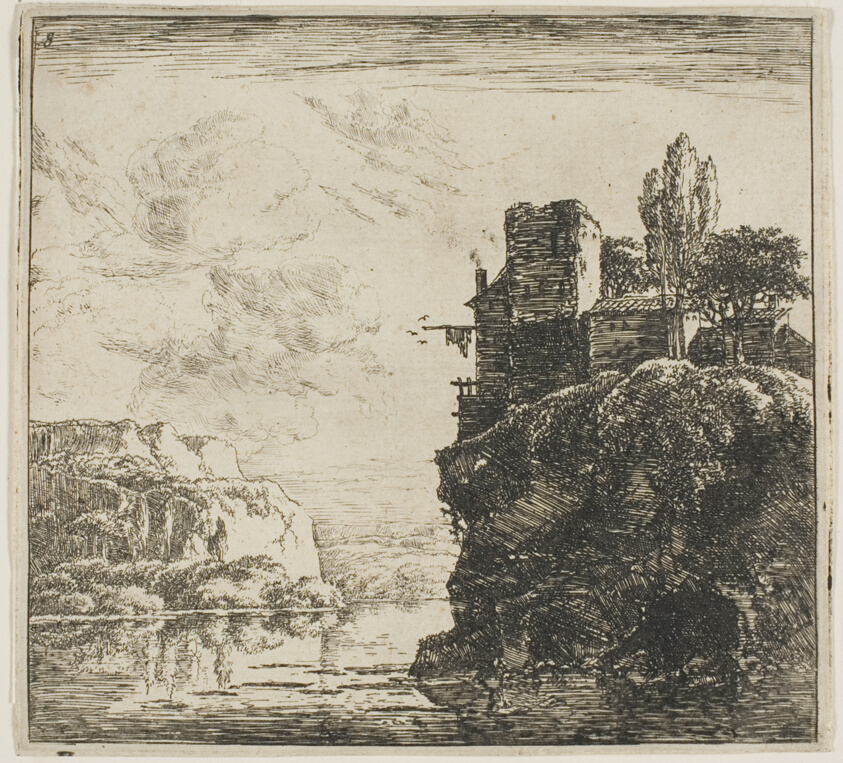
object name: Print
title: A River between Rocks, from the series Set of Landscapes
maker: Herman Naijwincx (Dutch, 1624-1651)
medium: Etching on ivory paper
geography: Netherlands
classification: etching; print; prints and drawing